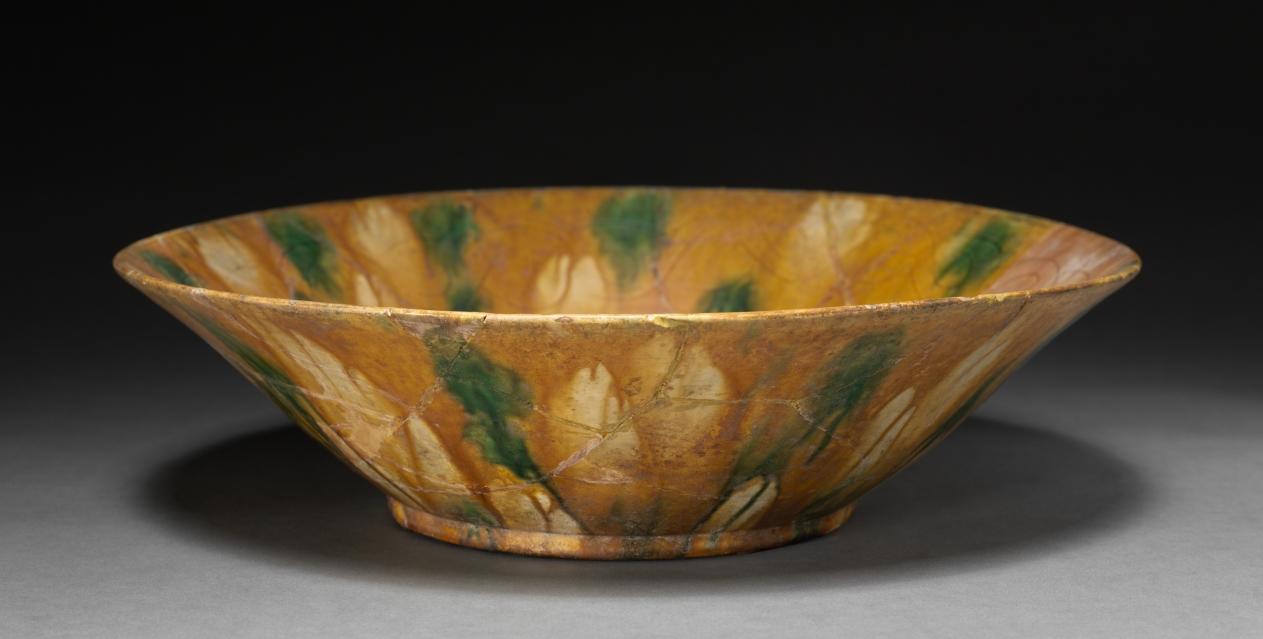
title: Bowl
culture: Iraq or Iran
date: 800s–900s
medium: earthenware with painted underglaze and incised design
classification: Ceramic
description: This large bowl with flaring sides is splashed with yellow, brown, and green pigments, which have run during the firing process, in imitation of Tang Chinese ceramics.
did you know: Look closely: the bowl has incised decoration of a large palmette in the center and a split-leaf scroll pattern just inside the rim.